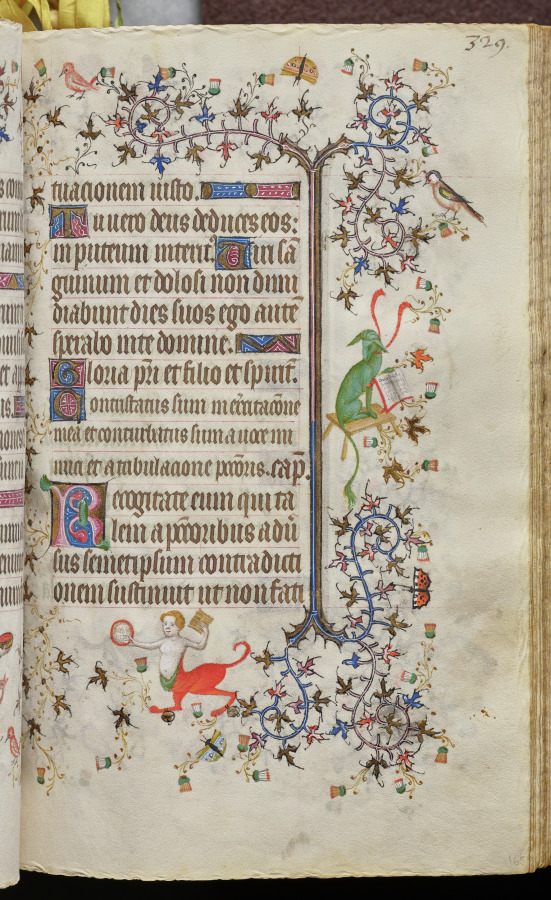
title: Hours of Charles the Noble, King of Navarre (1361-1425): fol. 165r, Text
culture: France, Paris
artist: Master of the Brussels Initials and Associates (French)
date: c. 1405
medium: ink, tempera, and gold on vellum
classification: Bound Volume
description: This precious volume was obviously highly prized by its owner, the French-born King of Navarre, who had his coat of arms painted on no less than twenty folios. Rather than directly commissioning this manuscript from a specific workshop, it seems that Charles the Noble acquired his book of hours -- perhaps ready-made for the luxury market -- while on a trip to Paris in 1404-05. A collaborative effort, six painting styles are evidenced within the pages of this codex, those of two Italians, two Frenchmen, and two Netherlanders. The painter who was responsible for the planning and decoration of the book, and who produced seventeen of the large miniatures, was a Bolognese artist known as the Master of the Brussels Initials. His principal assistant, responsible for most of the borders, was a Florentine who signed his name "Zecho" da Firenze on folio 208 verso.